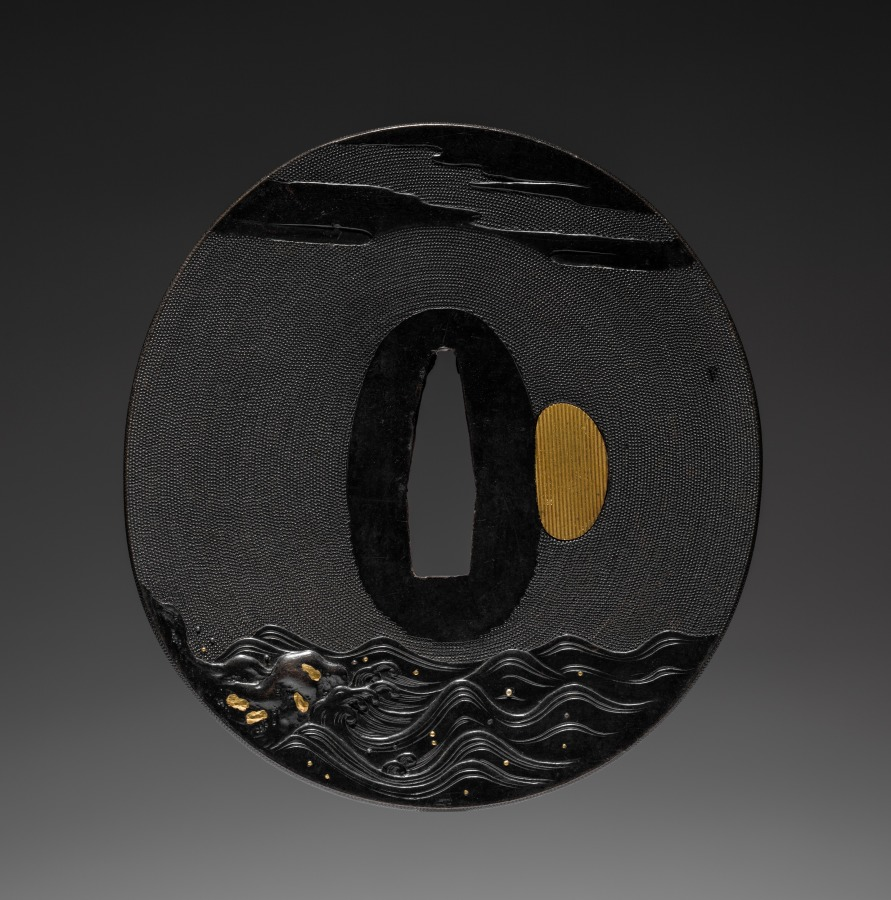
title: Sword Guard (Tsuba)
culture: Japan, Edo period (1615–1868)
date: mid-1800s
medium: bronze and gold foil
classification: Arms and Armor